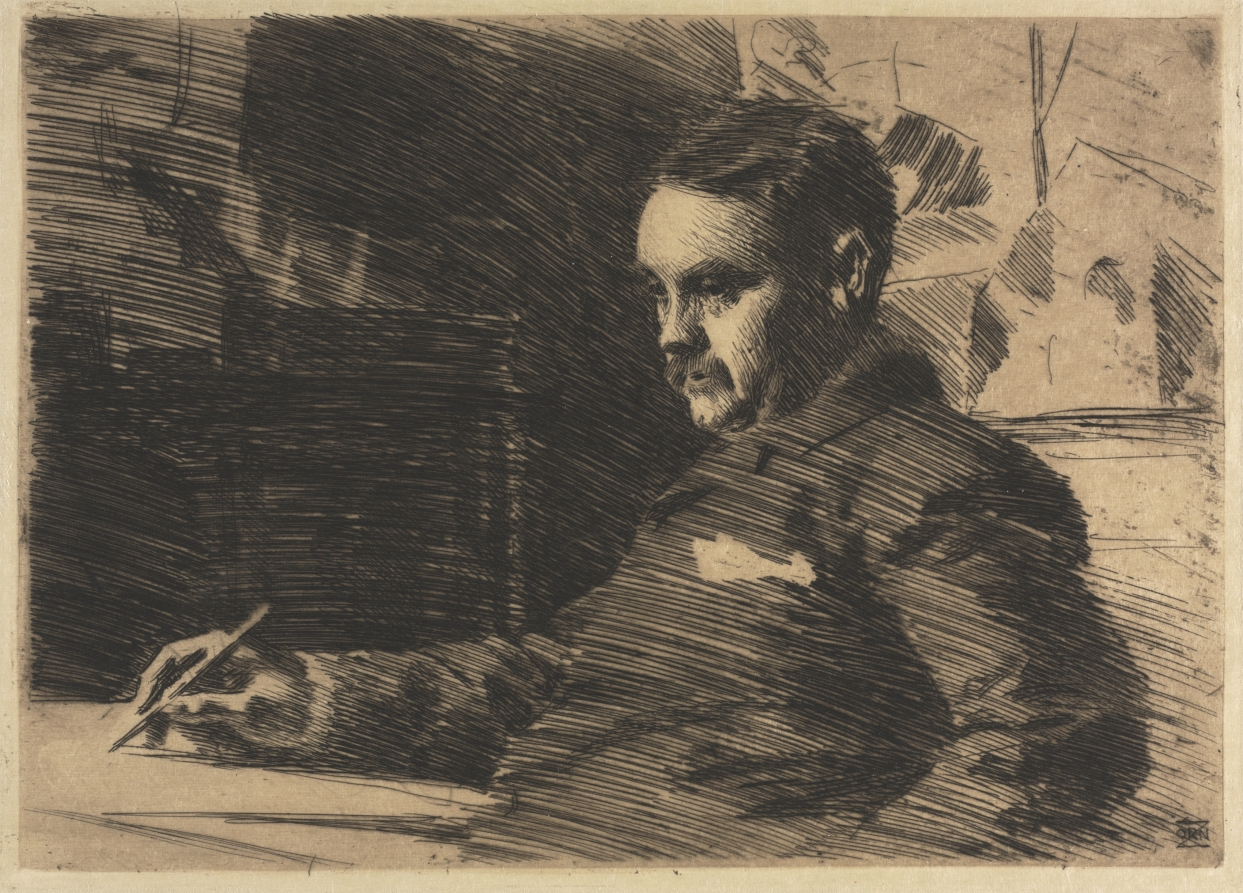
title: Lawyer Wade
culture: Sweden, late 19th Century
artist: Anders Zorn (Swedish, 1860–1920)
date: 1890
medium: etching and drypoint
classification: Print